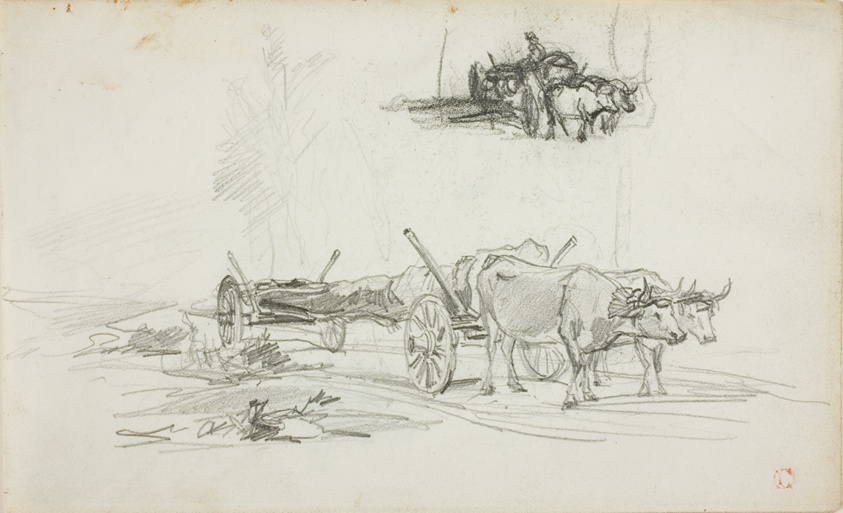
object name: Drawing and Watercolor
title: Two Sketches of Oxen Hauling a Log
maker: Charles François Daubigny (French, 1817-1878)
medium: Graphite on ivory wove paper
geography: France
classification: graphite; drawings (visual works); prints and drawing